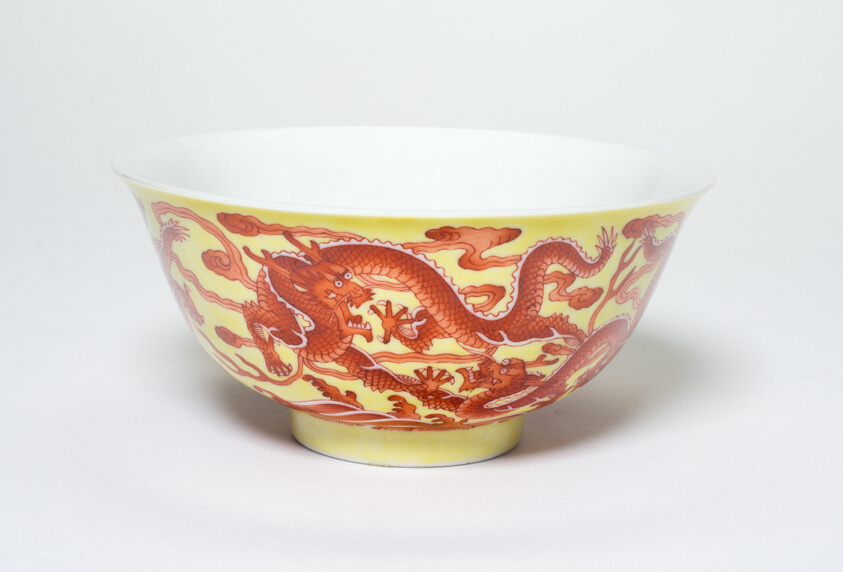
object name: Vessel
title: One of a Pair of Yellow and Iron-Red Dragon Bowls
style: Chinese (culture or style)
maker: China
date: Qing dynasty (1644–1912), Qianlong reign mark and period (1736–1795)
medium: Porcelain painted in underglaze iron red and overglaze yellow enamel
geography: China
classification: bowl; porcelain; dish (vessel); asian art; ceramics; vessel